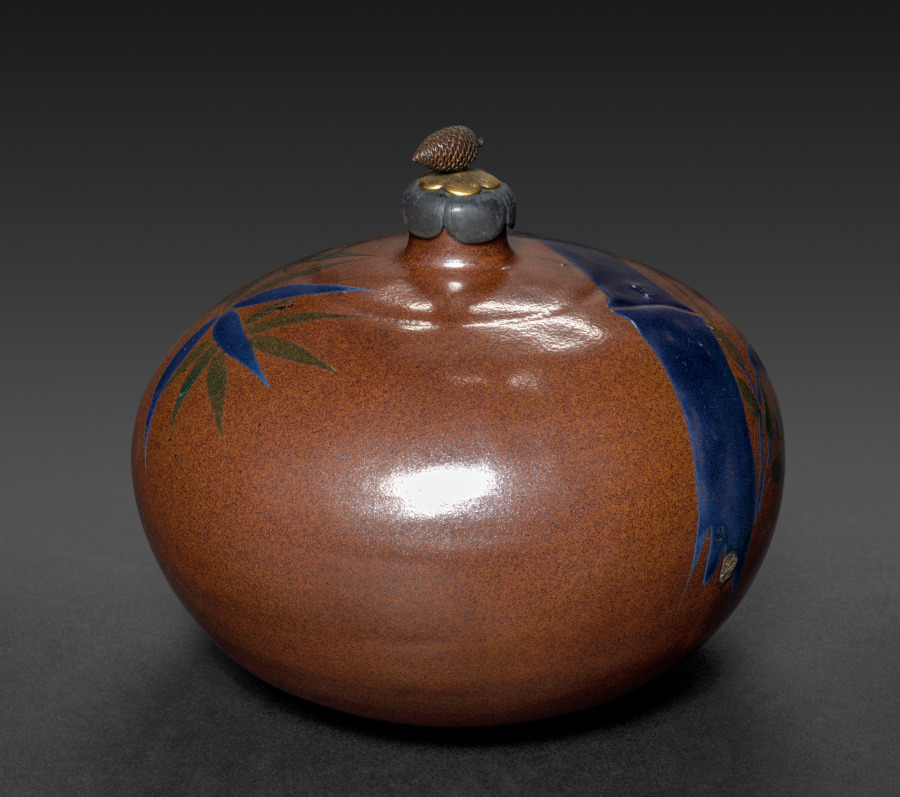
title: Jar with Stopple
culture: Japan, Edo period (1615–1868)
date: 1700s to mid-1800s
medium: stoneware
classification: Ceramic